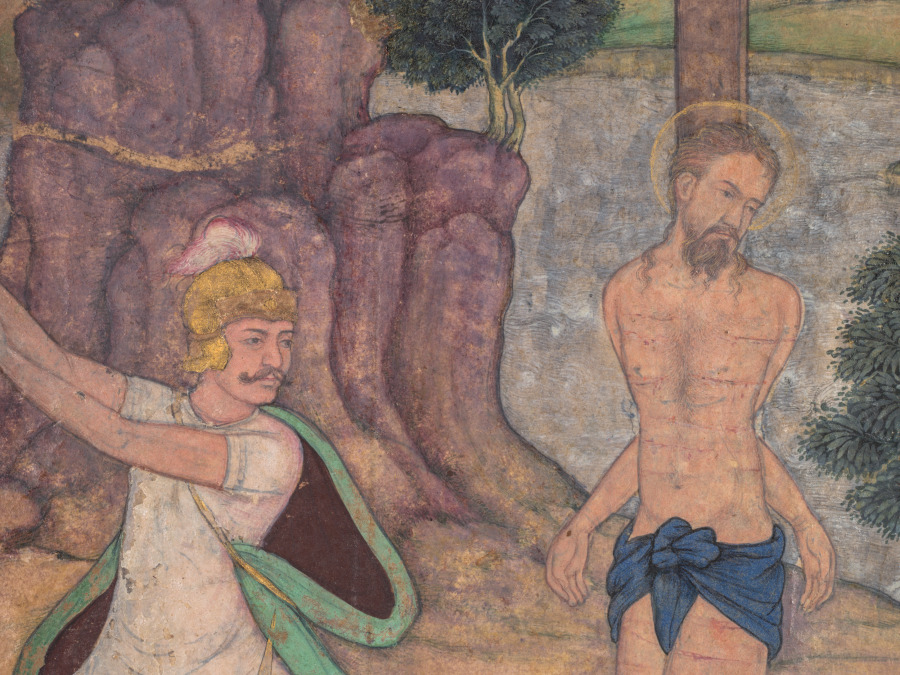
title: The Flagellation (folio 182 recto), from a Mirror of Holiness (Mir’at al-quds) of Father Jerome Xavier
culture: Mughal India, Allahabad, made for Prince Salim (1569–1627)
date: 1602–4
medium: Gum tempera, ink, color, and gold on paper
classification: Manuscript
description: Two Romans flog Jesus, who has been bound to a stake at the center of the circular composition made up of soldiers and the hilly horizon. His subtly articulated expression conveys both pain and compassion, as he endures cuts to his flesh and the bindings around his elbows that secure him so tightly to the post that his feet are elevated off the ground. This is the last illustration in the Cleveland manuscript of the Mirror of Holiness. The Crucifixion was never illustrated, possibly because the patron, Prince Salim, was Muslim. According to the Koran, Jesus did not die on the cross, but was absorbed into heaven by Allah.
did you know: A halo encircles Jesus’s head, and his hair and beard are highlighted with gold.